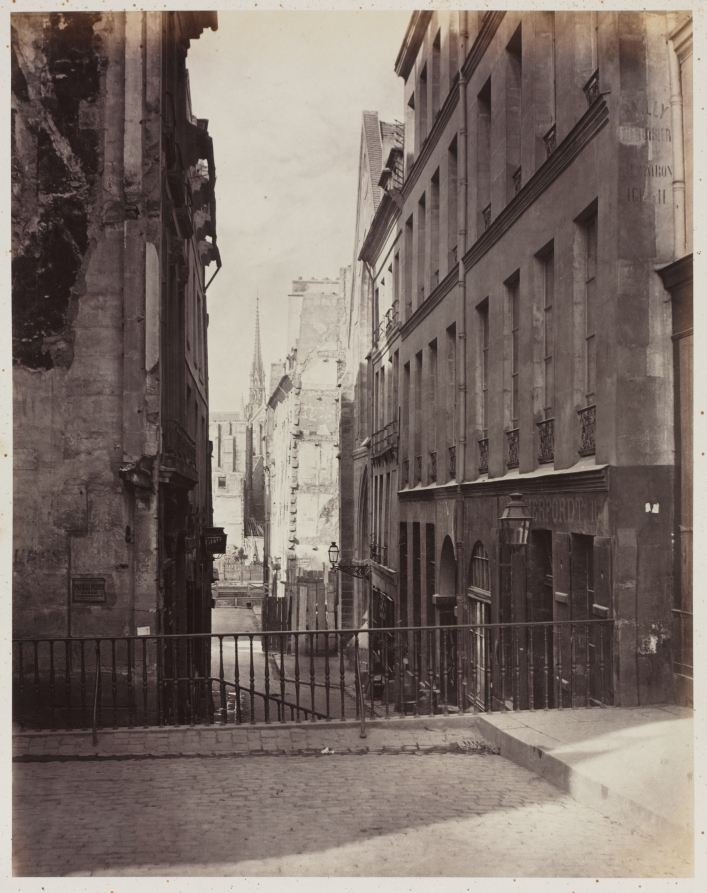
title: Rue Jean-de-Beauvais. Vue prise de la rue des Écoles vers la boulevard Saint-Germain, en travaux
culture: France, 19th century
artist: Charles Marville (French, 1813–1879)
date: 1865–1869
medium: albumen print from wet collodion negative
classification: Photograph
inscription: Written in pencil on recto of mount: "36" Written in pencil on lower left corner of mount: "R 11 36j" Written in pencil on lower right area of mount: "Rue Jean de Beauvais de la rue des Ecoles (script)"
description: Jean-de-Beauvais Street dates back to the 1300s. Stairs rather than a traffic intersection mark where it meets the rue des Écoles, which is seen in the foreground and is higher in elevation. In the background, the light area is the intersection of rue Jean-de-Beauvais with the Boulevard Saint-Germain, seen here under construction. Haussmann strung together and widened numerous narrow older streets to form the long, airy boulevard. Charles Marville makes our eye traverse the dark, narrow medieval street before we emerge into the sunlight of the modern thoroughfare.